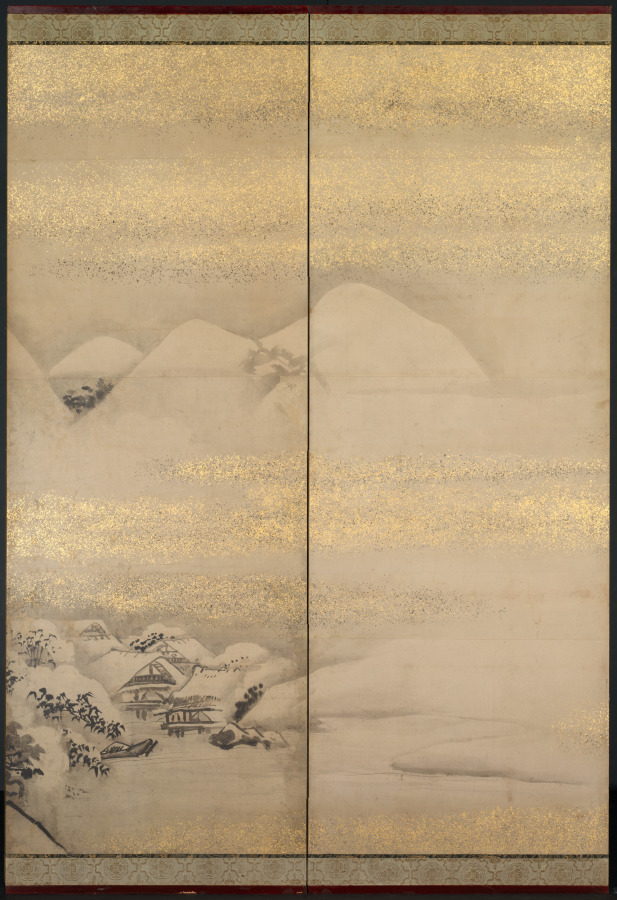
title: Summer and Winter Landscapes (one of a pair)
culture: Japan, Edo period (1615–1868)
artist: Kano Naonobu (Japanese, 1607–1650)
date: 1600s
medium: six-panel folding screen; ink on gold- and silver-decorated paper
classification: Painting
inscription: signed: "Jitekisai Naonobu"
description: This sparse composition depicts a summer scene on the right and a winter scene on the left. Careful observation reveals that the pair of screens was once damaged, and a later conservation including new sections of paper and inpainting sought to preserve the original flavor of the paintings so they could continue to be appreciated. Kano Naonobu was born in Kyoto, the younger brother of major painter and authenticator Kano Tan’yū (1602–1674). He relocated to Edo (present-day Tokyo) at the behest of the Tokugawa government in 1630 where he worked with his brother and teacher. In Kyoto, he helped his brother with paintings for Nijō Castle and the major Pure Land Buddhist temple Chion’in.